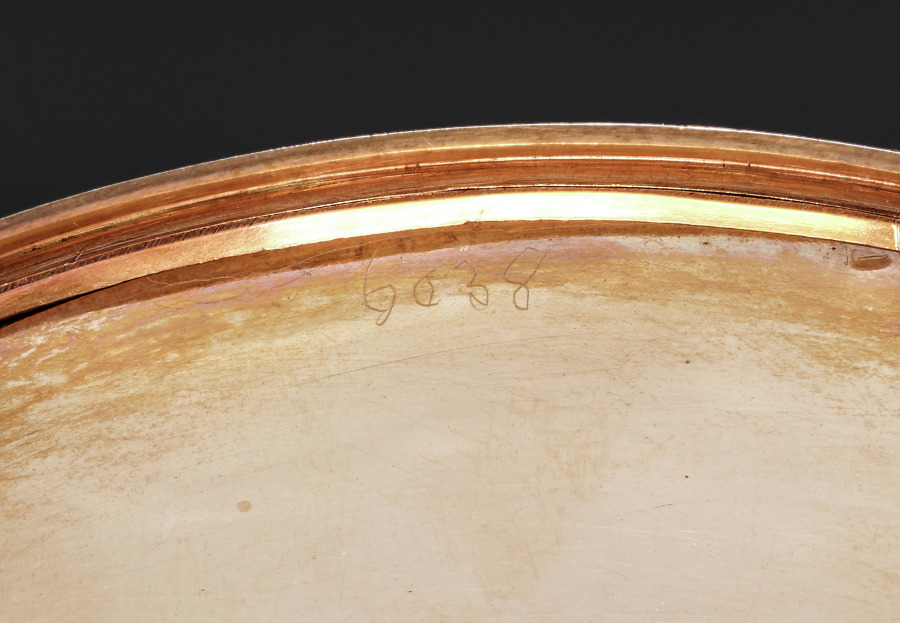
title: Box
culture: Switzerland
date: late 1700s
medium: gold and enamel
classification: Miscellaneous